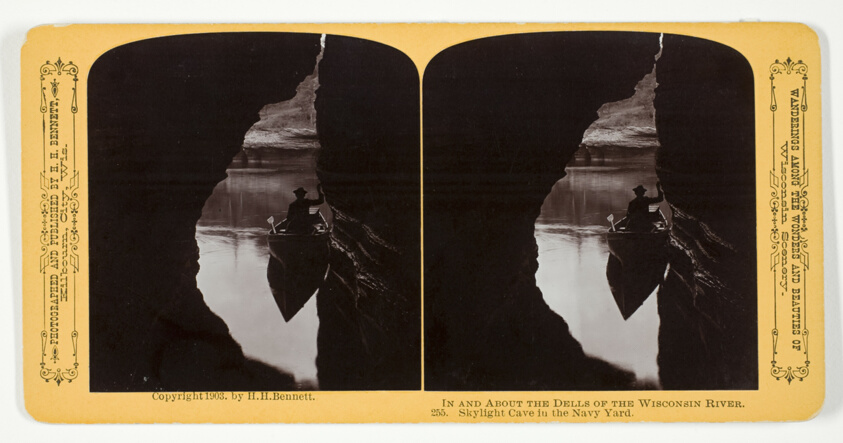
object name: Photograph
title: Skylight Cave in the Navy Yard, No. 255 from the series "In and About the Dells of the Wisconsin River"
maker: Henry Hamilton Bennett (American, born Canada, 1843–1908)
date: 1903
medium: Albumen print, stereo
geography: United States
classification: stereograph (albumen); albumen silver print; photographic process; photography; photograph